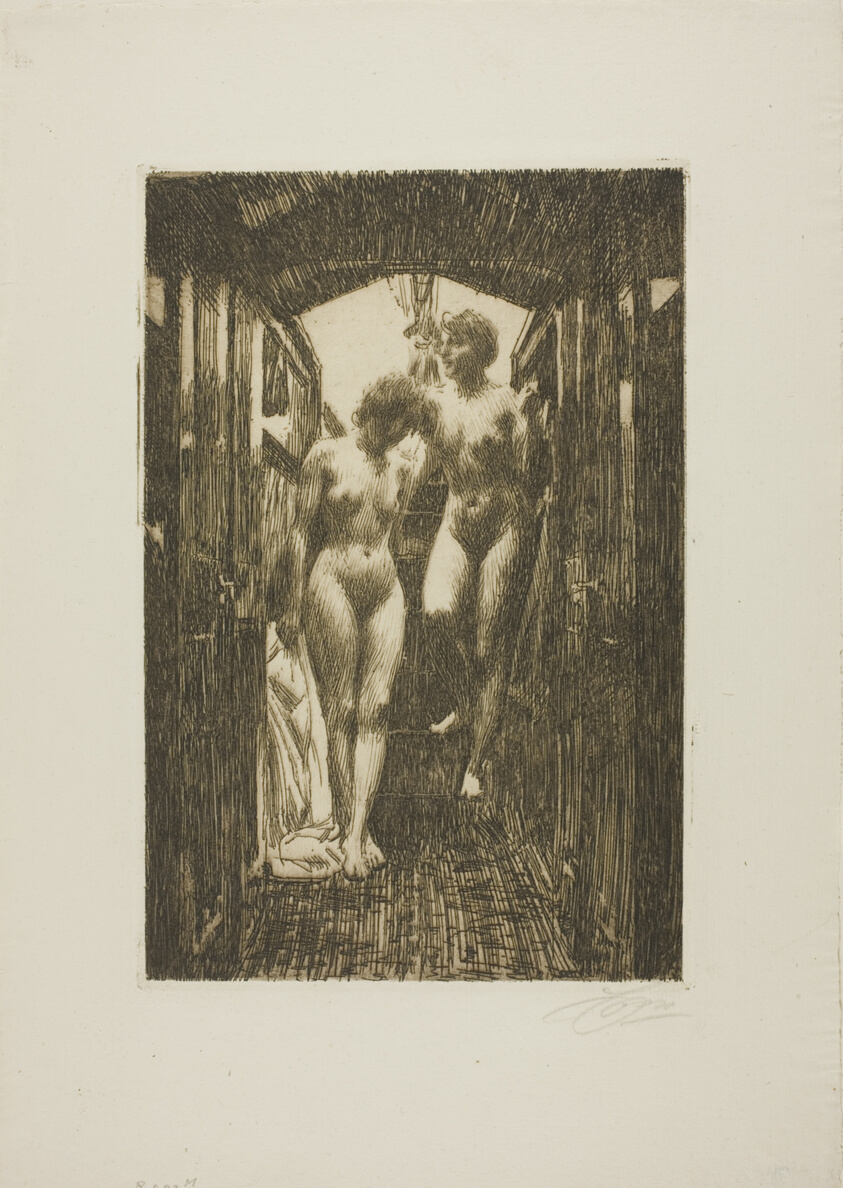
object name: Print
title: Cabin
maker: Anders Zorn (Swedish, 1860-1920)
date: 1917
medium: Etching on ivory laid paper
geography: Sweden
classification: etching; print; prints and drawing